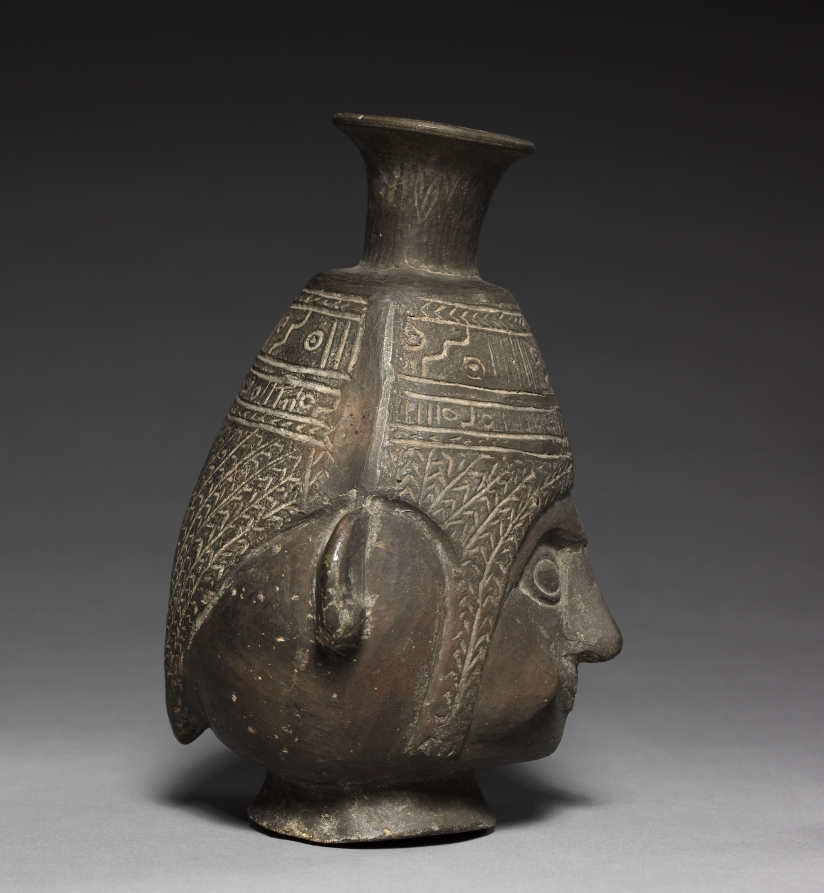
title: Bottle Vase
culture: Peru, Chimú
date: c. 1400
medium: black ware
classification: Ceramic